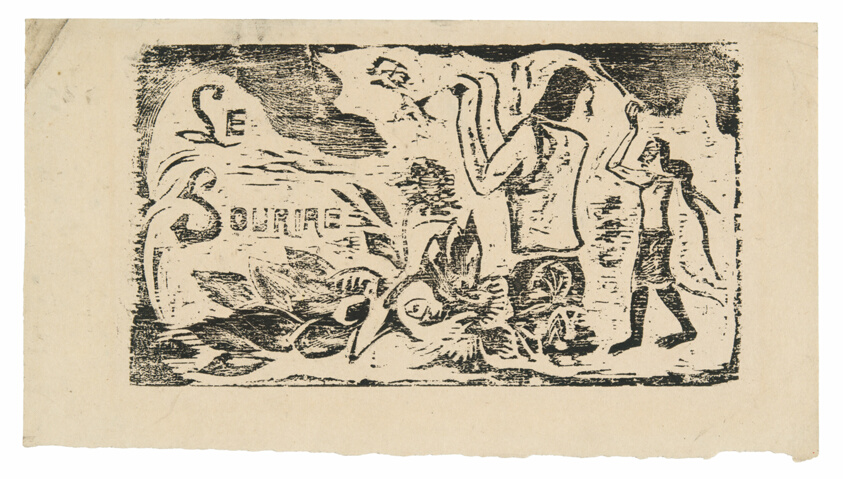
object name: Print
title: Tahitians, Flowers, and Leaves, headpiece for Le sourire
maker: Paul Gauguin (French, 1848-1903)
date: 1899/1900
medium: Wood-block print in black ink on cream wove paper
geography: France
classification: woodcut; print; prints and drawing